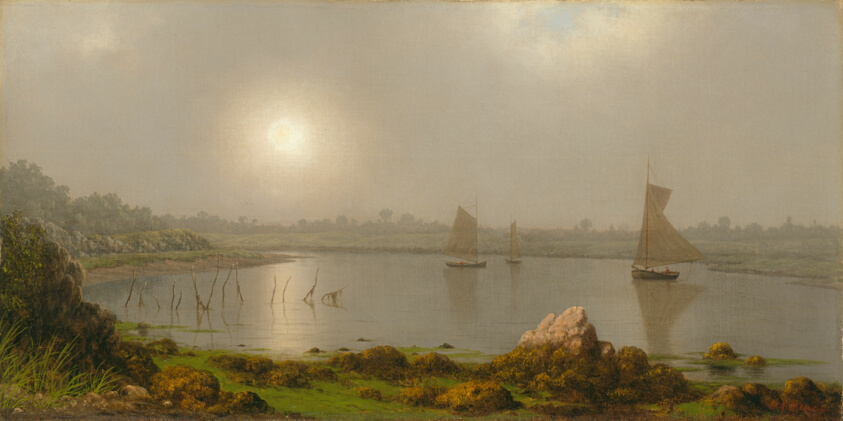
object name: Painting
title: York Harbor, Coast of Maine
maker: Martin Johnson Heade (American, 1819–1904)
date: 1877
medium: Oil on canvas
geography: York Harbor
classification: painting; american arts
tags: landscapes, sailing, ships, water, Maine, harbors